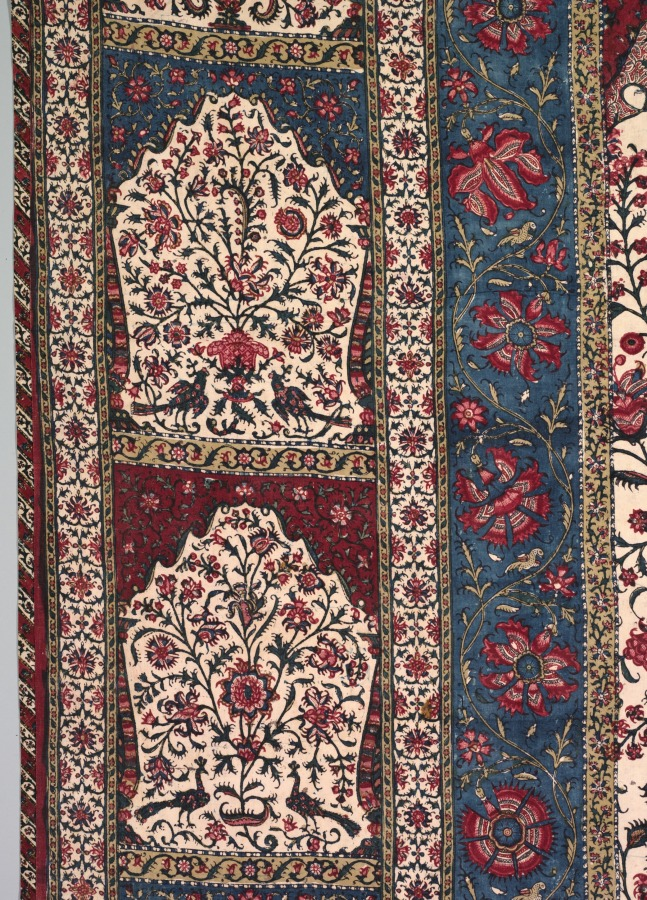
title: Chintz door curtain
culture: Iran, Isfahan, Qajar period (1779–1925)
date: 1800s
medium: Cotton: plain weave; chintz; hand drawing and block printing: bleach, mordant, and dye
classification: Textile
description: Lightweight white cotton cloth was transformed into this beautiful chintz, admired for its vibrant and durable colors, stunning pattern, fine quality, and rarity. Peacocks and a variety of birds appear amid vines with fanciful blossoms in the niche field and main border. Striking end borders feature blossoms in leaf-outlined diamonds on alternating ground colors of white, mustard, red, and blue. The complex chintz technique involving hand drawing, block printing, bleach, mordant, and dyes was developed in India. By the 1600s and 1700s, chintz was designed to target European and Asian markets and often featured large tree-of-life patterns. Chintz was also made in Iran by the 1400s, but this rare door curtain from the 1800s is among the oldest known examples.